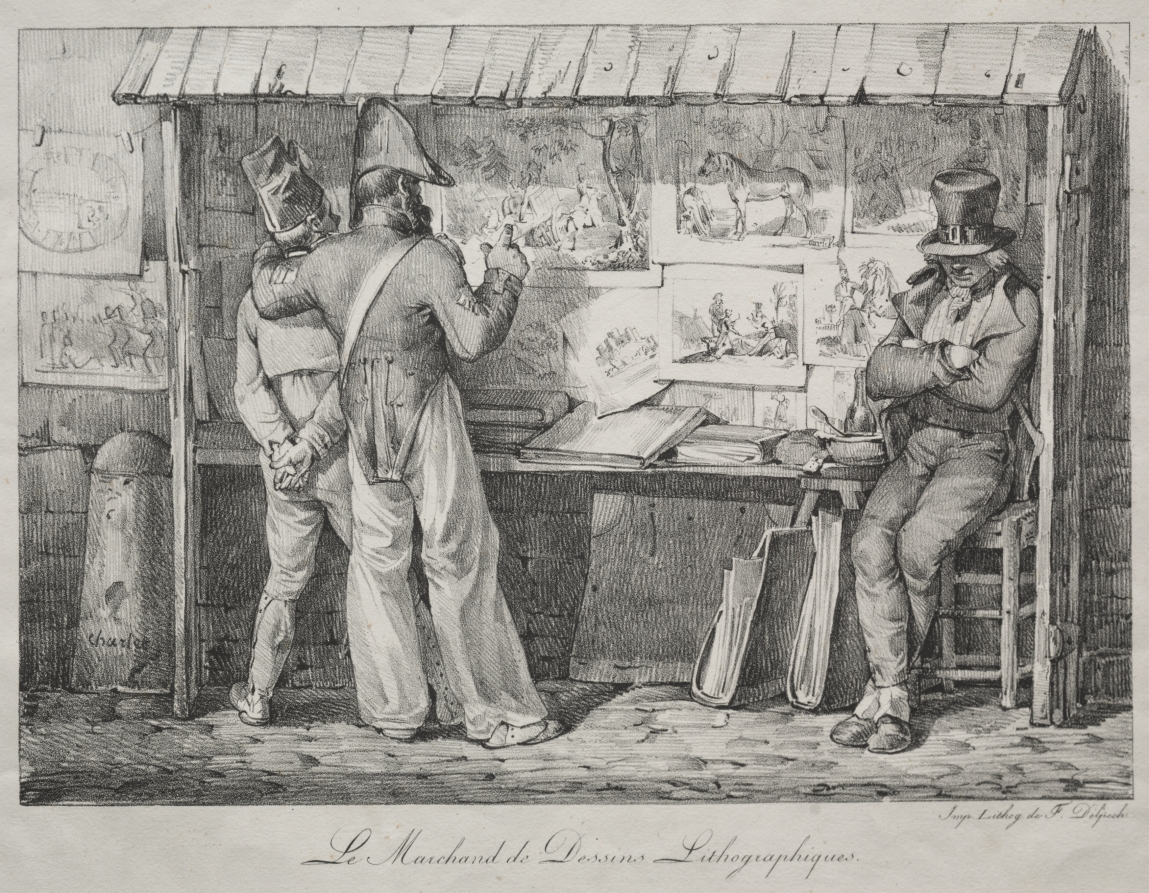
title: The Lithograph Dealer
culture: France, 19th century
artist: Nicolas Toussaint Charlet (French, 1792–1845)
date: c. 1819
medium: lithograph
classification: Print